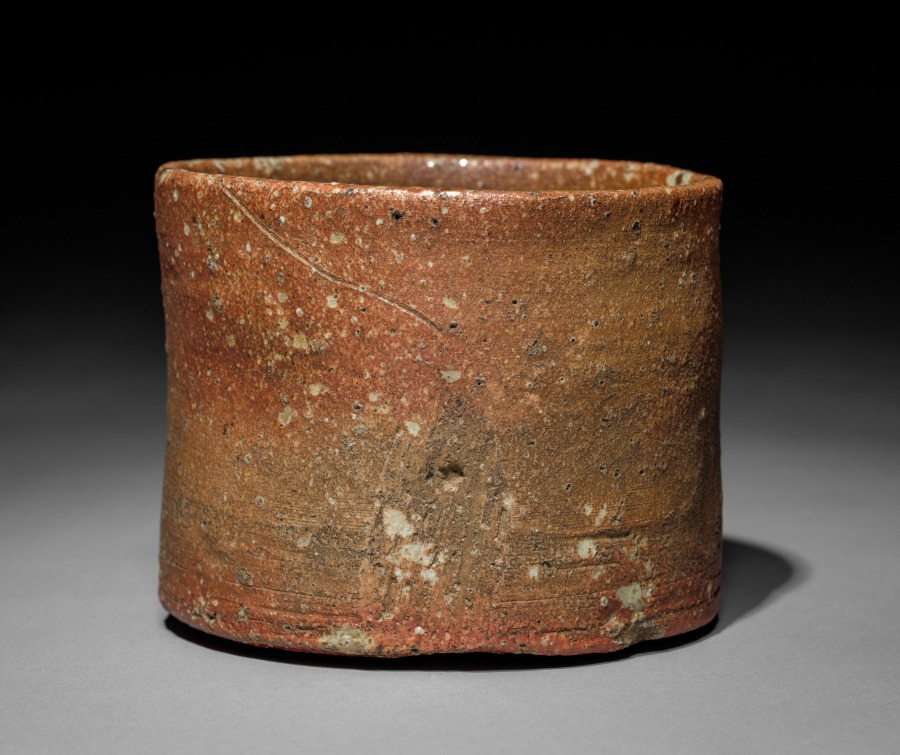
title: Tea Bowl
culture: Japan, Edo period (1615–1868)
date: 1600s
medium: stoneware with natural ash glaze (Shigaraki ware)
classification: Ceramic